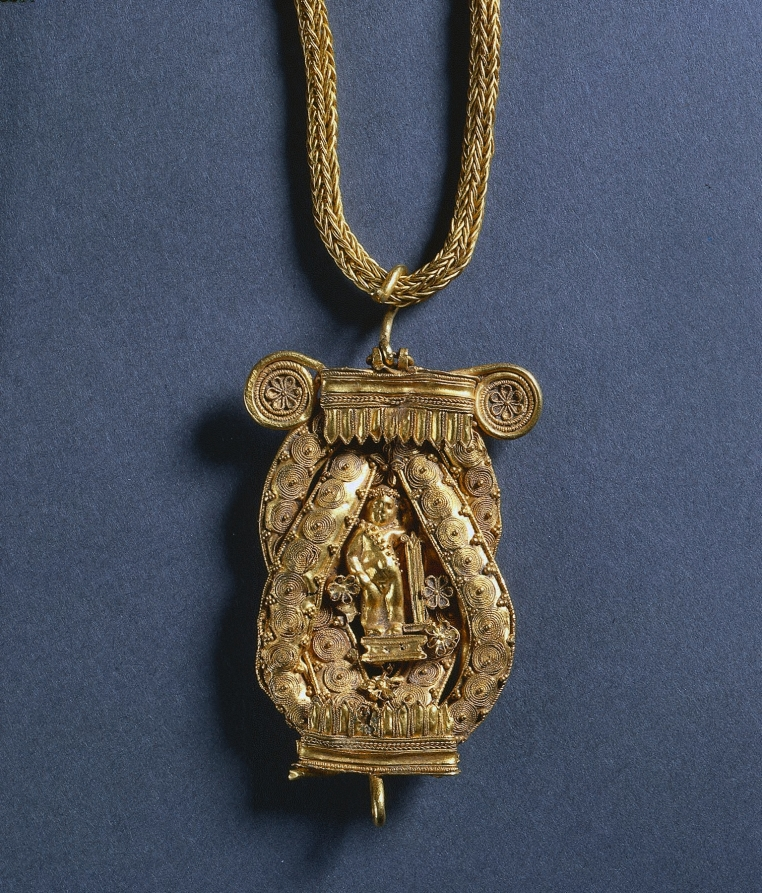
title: Chain and Pendant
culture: Greece, Hellenistic period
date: 200s BCE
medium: gold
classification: Jewelry